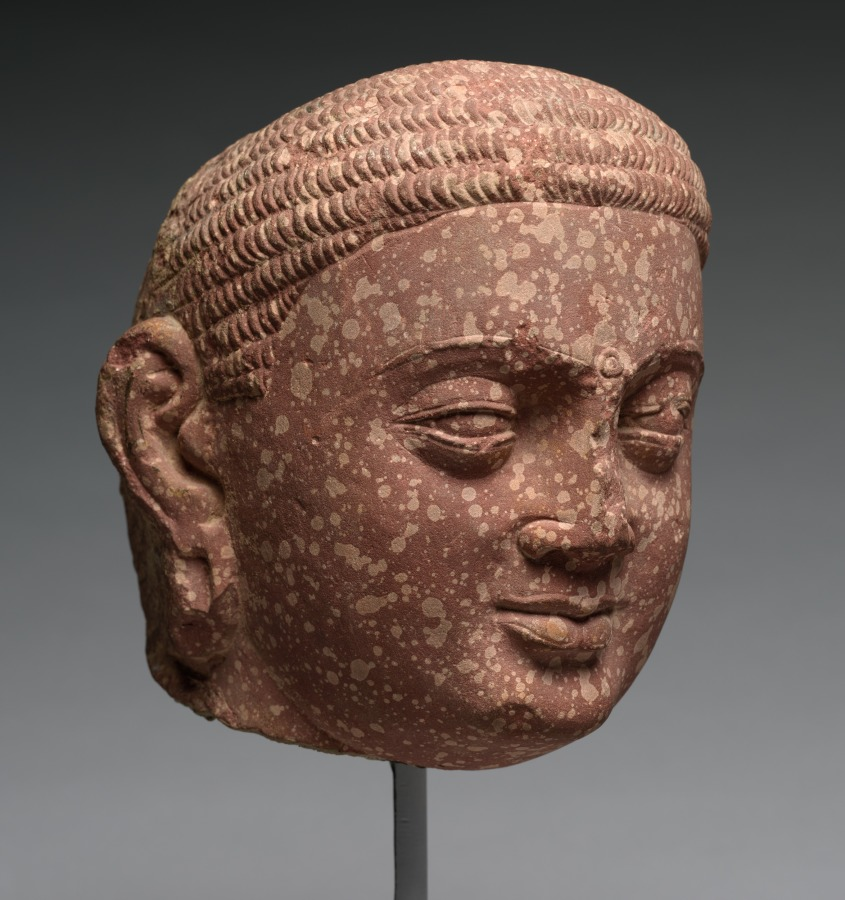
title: Head of Jina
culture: India, Mathura, Kushan period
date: c. 150–75 CE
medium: red mottled sandstone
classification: Sculpture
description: The short rows of hair show the new growth after this figure pulled out every lock by hand. Such a radical act demonstrated renunciation from a society that dictated the wearing of long hair to be covered by a turban. Since there is no protrusion at the top of the head, he can be recognized as a Jina, rather than a Buddha or other holy man. His slight smile and placid alert gaze communicate the power, bliss, and wisdom of one who has reached a state of pure knowing and liberation from delusions.